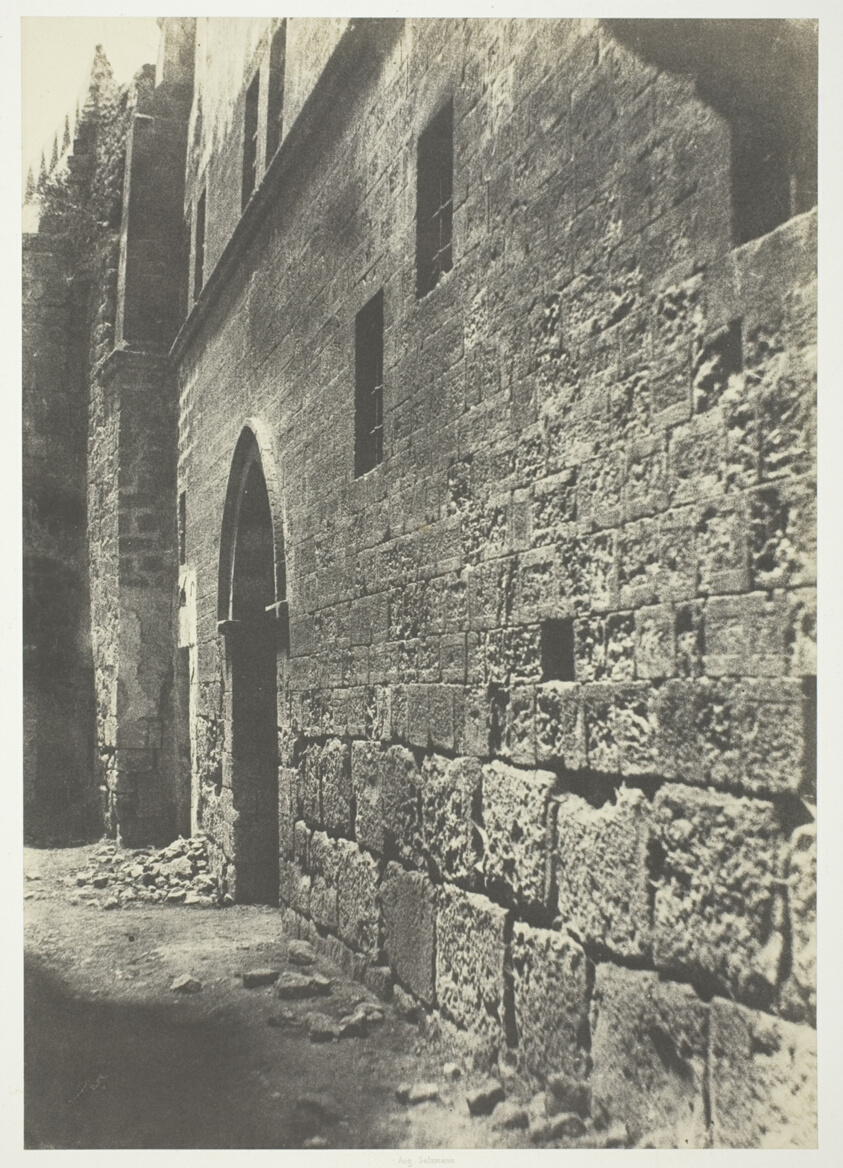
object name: Photograph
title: Jérusalem, Auberge d'Allemagne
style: 19th century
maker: Auguste Salzmann (French, 1824–1872)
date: 1854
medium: Salted paper print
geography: France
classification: salted paper print; photographic process; photography; photograph